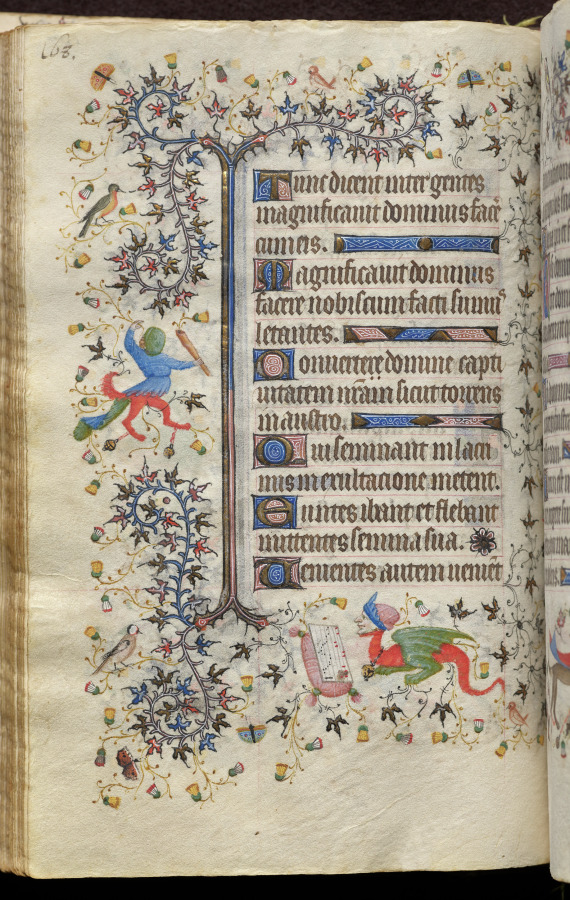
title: Hours of Charles the Noble, King of Navarre (1361-1425): fol. 84v, Text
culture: France, Paris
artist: Master of the Brussels Initials and Associates (French)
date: c. 1405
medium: ink, tempera, and gold on vellum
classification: Bound Volume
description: This precious volume was obviously highly prized by its owner, the French-born King of Navarre, who had his coat of arms painted on no less than twenty folios. Rather than directly commissioning this manuscript from a specific workshop, it seems that Charles the Noble acquired his book of hours -- perhaps ready-made for the luxury market -- while on a trip to Paris in 1404-05. A collaborative effort, six painting styles are evidenced within the pages of this codex, those of two Italians, two Frenchmen, and two Netherlanders. The painter who was responsible for the planning and decoration of the book, and who produced seventeen of the large miniatures, was a Bolognese artist known as the Master of the Brussels Initials. His principal assistant, responsible for most of the borders, was a Florentine who signed his name "Zecho" da Firenze on folio 208 verso.